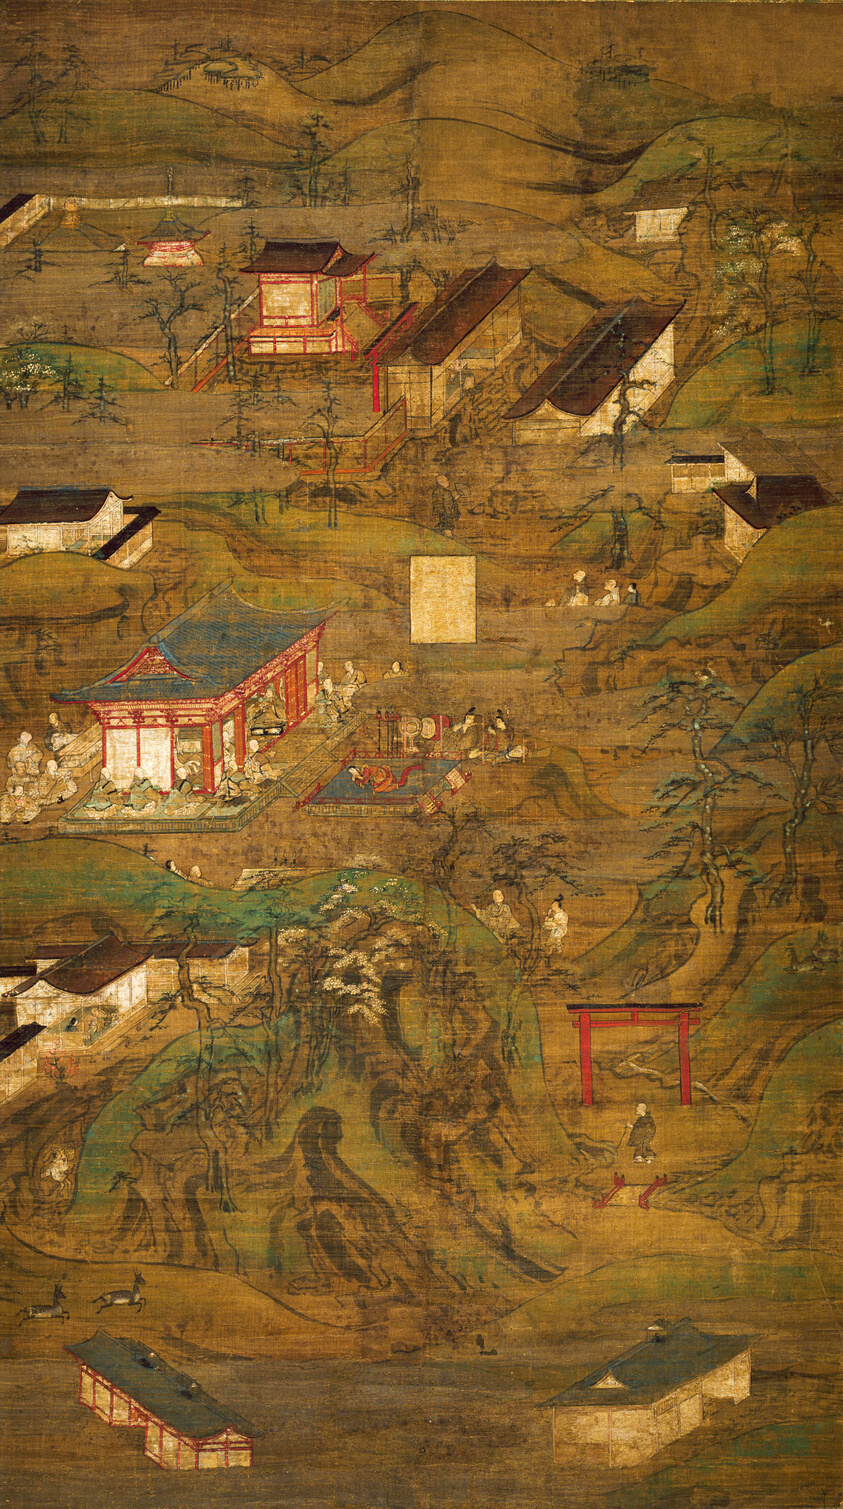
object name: Painting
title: Illustrated Legends of the Tenchi-in (Tenchi-in engi)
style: Japanese (culture or style)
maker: Artist unknown; Japanese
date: 14th century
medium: Hanging scroll; ink and colors on silk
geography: Japan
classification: painting; asian art